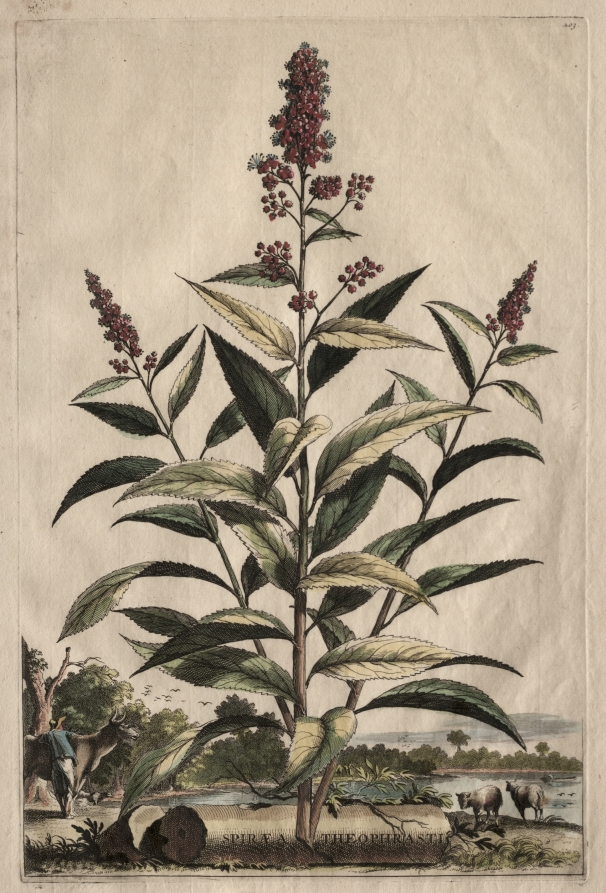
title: Phytographia Curiosa: Spiraea Theophrasti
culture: Netherlands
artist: Abraham Munting (Dutch, 1626–1683)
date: c. 1651–83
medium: etching, hand colored with watercolor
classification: Print